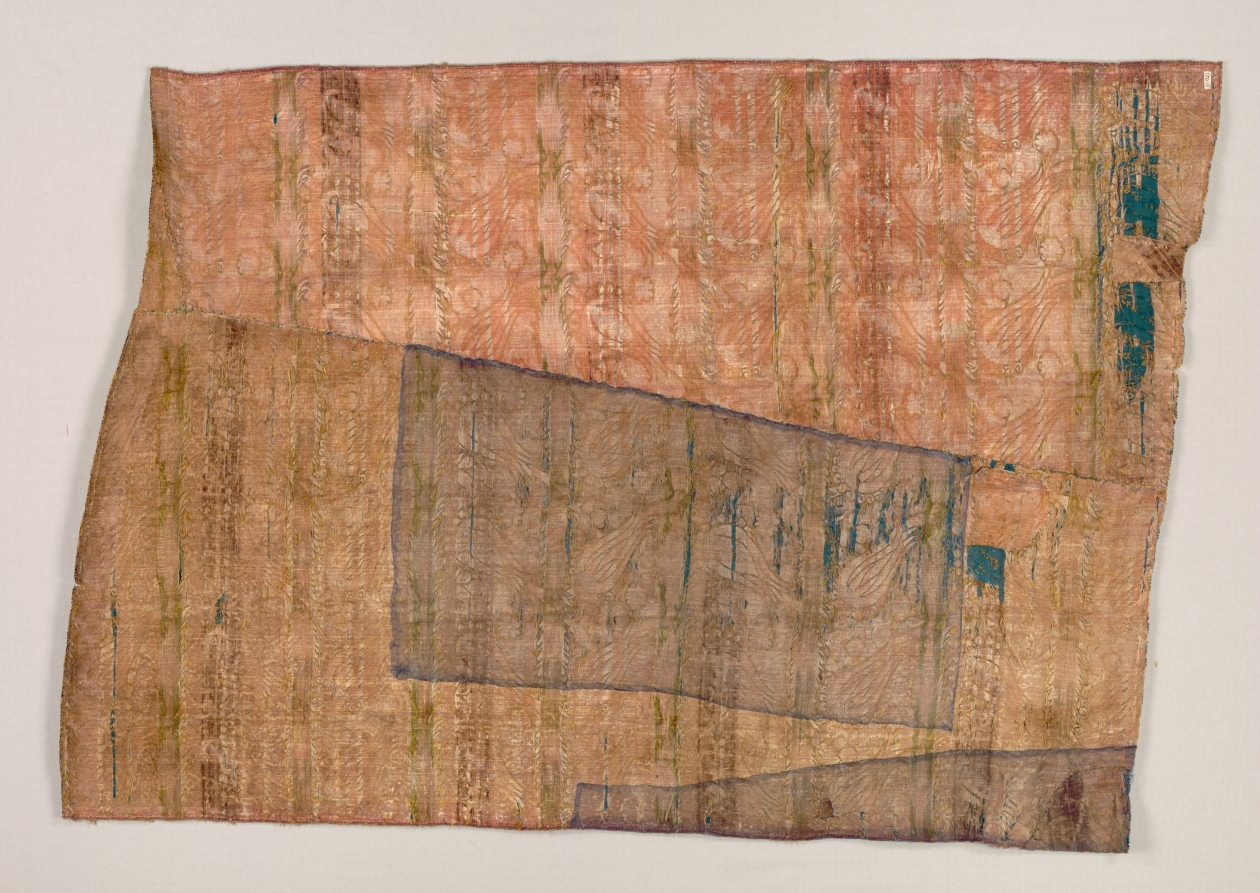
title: Lampas with compressed undulating vines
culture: Turkey, Bursa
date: early 1600s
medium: lampas: silk and gilt-metal thread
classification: Textile